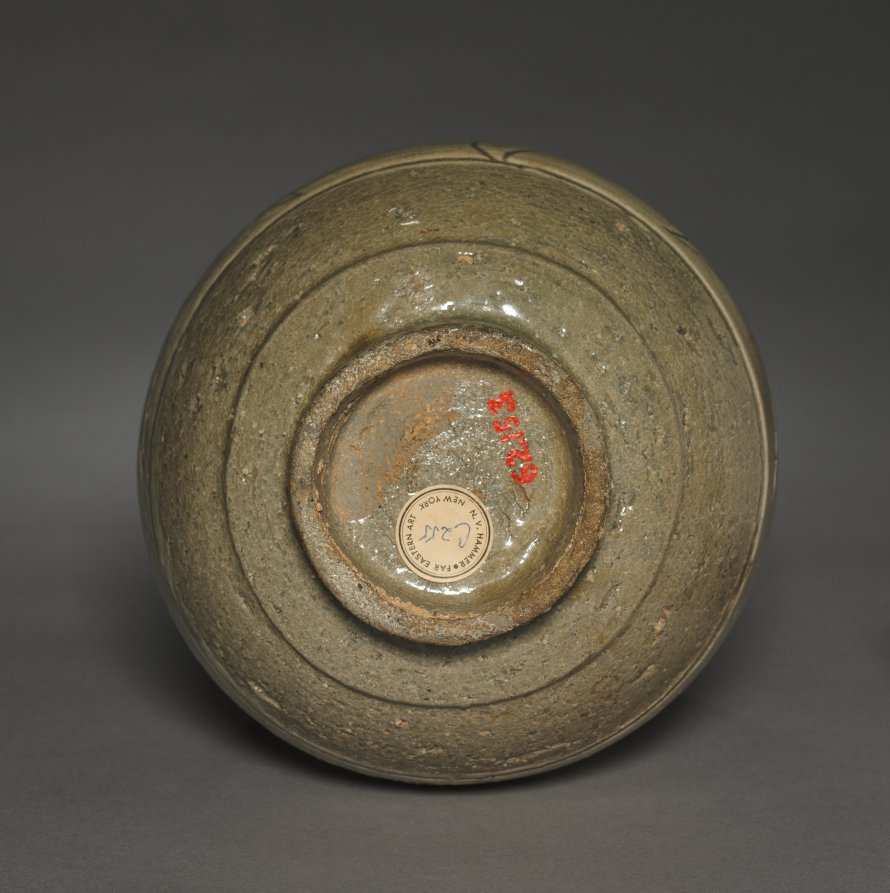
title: Bottle with Incised and Sgraffito Fish Design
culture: Korea, Joseon dynasty (1392–1910)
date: 1400s–1500s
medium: stoneware with incised design (Buncheong ware)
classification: Ceramic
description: This whimsical bottle is classified as Buncheong 분청 (literally, powdered green). Flourishing during the 1400s–1500s, Buncheong indicates pottery with iron-rich clay decorated with white slip. After firing, the color of the clay body usually became greenish-gray due to its high iron content. Korean artists tried to emulate the white porcelain wares of the Chinese Ming period, although the result was not the same. On the surface coated with white slip, the image of a smiling fish is carved in bold lines, a technique distinctive to Jeolla province, a southwest region of the Korean peninsula.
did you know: The fish depicted here seems to be a small yellow croaker, abundant off the southwest coast of the Korean peninsula.